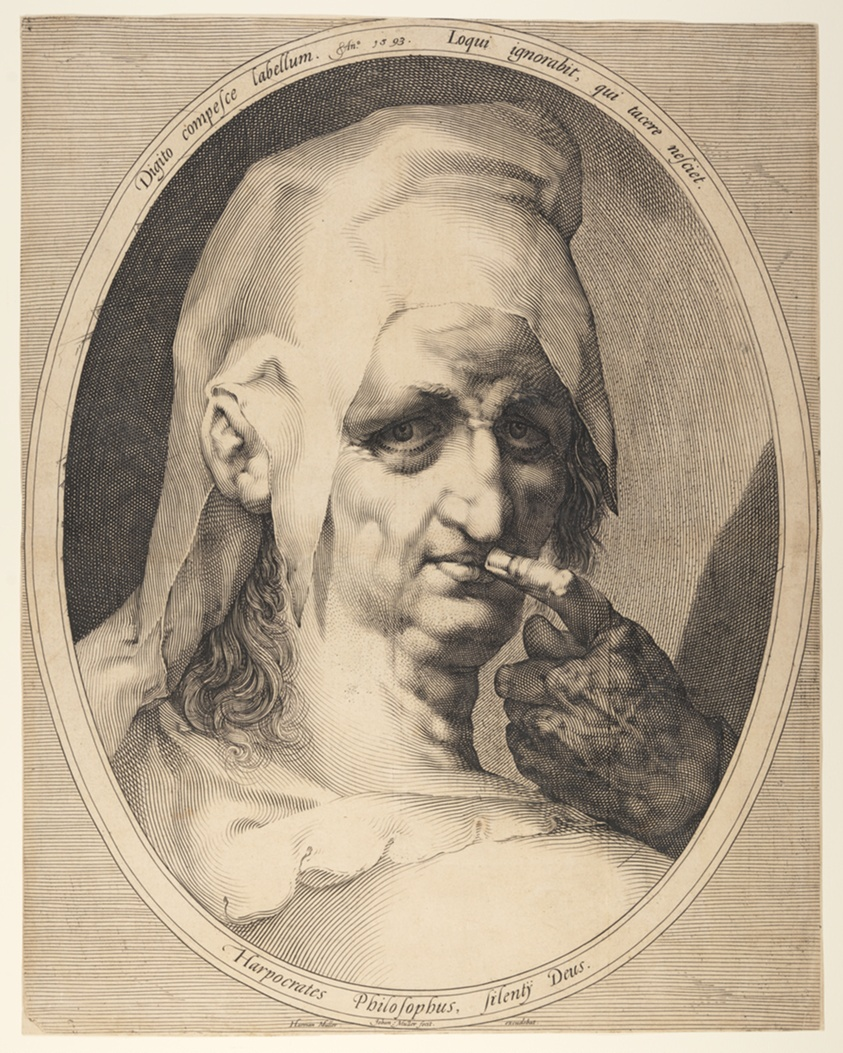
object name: Print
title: Harpocrates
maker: Jan Harmensz Muller; Dutch, 1571–1628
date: 1593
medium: Engraving on ivory laid paper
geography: Netherlands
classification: engraving; paper; print; prints and drawing